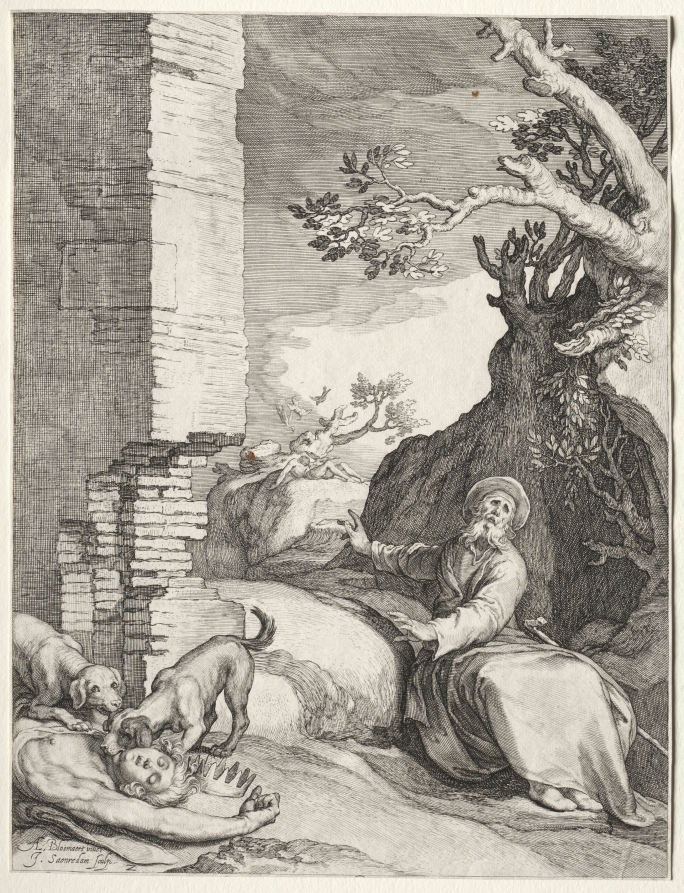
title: The Prediction of Ahijah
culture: Netherlands, early 17th Century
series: Scenes of the Prophet Ahijah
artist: Jan Saenredam (Dutch, 1565–1607)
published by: Jan Saenredam (Dutch, 1565–1607)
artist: after Abraham Bloemaert (Dutch, 1566–1651)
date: 1604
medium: engraving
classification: Print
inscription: lower left, in plate: A. Bloemaert inve. / J. Saenredam scupl. / Z ; VERSO, lower left, in graphite: PvA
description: As punishment for the king's sins, the prophet predicts disaster saying, "those of your people who die in the city shall be eaten by dogs, and those who die in the field shall be eaten by birds." Ahijah is seated, pointing to two dying people including the young man with the crown, presumably Jeroboam's son.